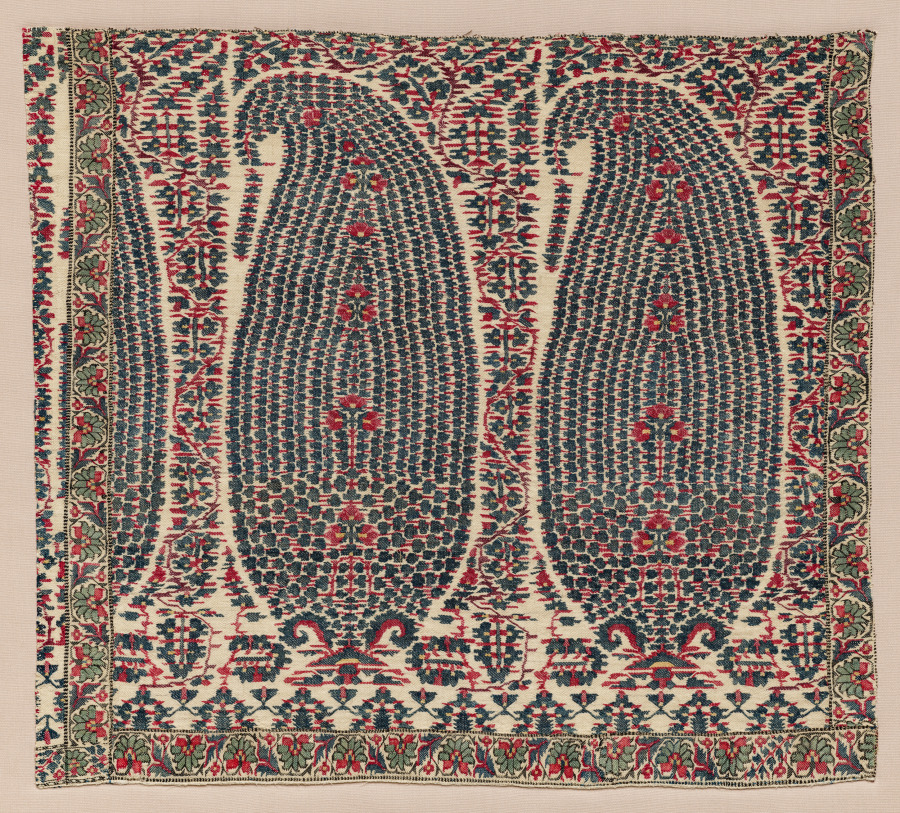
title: Fragment of a Shawl Border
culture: Kashmir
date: c. 1815–25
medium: wool and silk: tapestry twill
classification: Textile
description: Many Kashmiri textiles, even those from the early 1800s, come down to us in fragments. This shawl border was once a part of a larger piece, which could have simply been draped over the body or stitched to the hem of a garment (as many European women did). Owning and wearing such luxury textiles would have been part of indicating one’s social status. Although incomplete, this work still shows the general pattern of the larger shawl, and it retains its vibrant and hypnotizing original color. Dyes were plant-based and are liable to wash out.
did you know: Red dyes for textiles could be made from pomegranate skins.